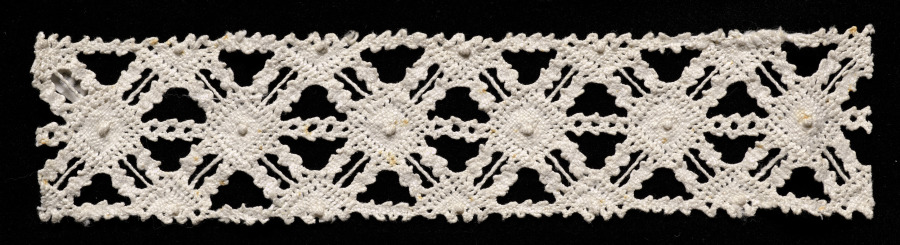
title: Lace Insertion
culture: Italy, Venice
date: 1540–60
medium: Bobbin lace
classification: Lace